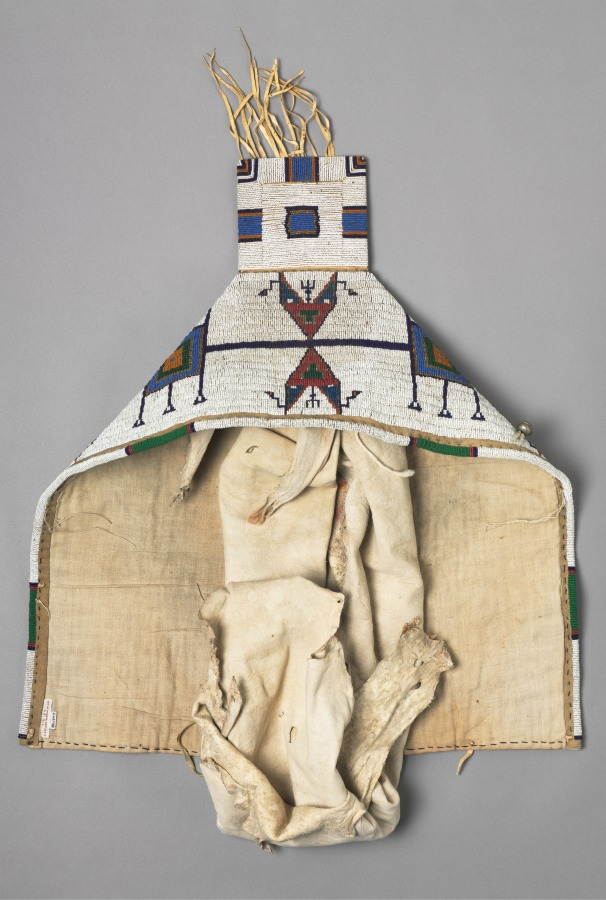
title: Cradle or Baby Carrier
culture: Native North America, Plains, Lakota (Sioux)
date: c. 1900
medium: Native-tanned hide, cotton cloth, glass beads, metal beads, brass bell, sinew thread, cotton thread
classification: Leather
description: Many Plains peoples hold lavishly quilled or beaded cradles in high esteem—they bestow spiritual benefits on the infant and prestige and honor on the family and the maker, usually a female relative. Indeed, today and in the past, creating such a cradle is often regarded as equal to counting coup, the ultimate act of male bravery in which a warrior touches an enemy with a stick known as a coup stick. This cradle was held in the arms; others have wooden frames that can be propped against a support, such as a sofa or a tree, to ease the baby’s socialization into the community.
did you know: In the past, young Plains children spent much of their time in cradles, which remain in occasional use today.